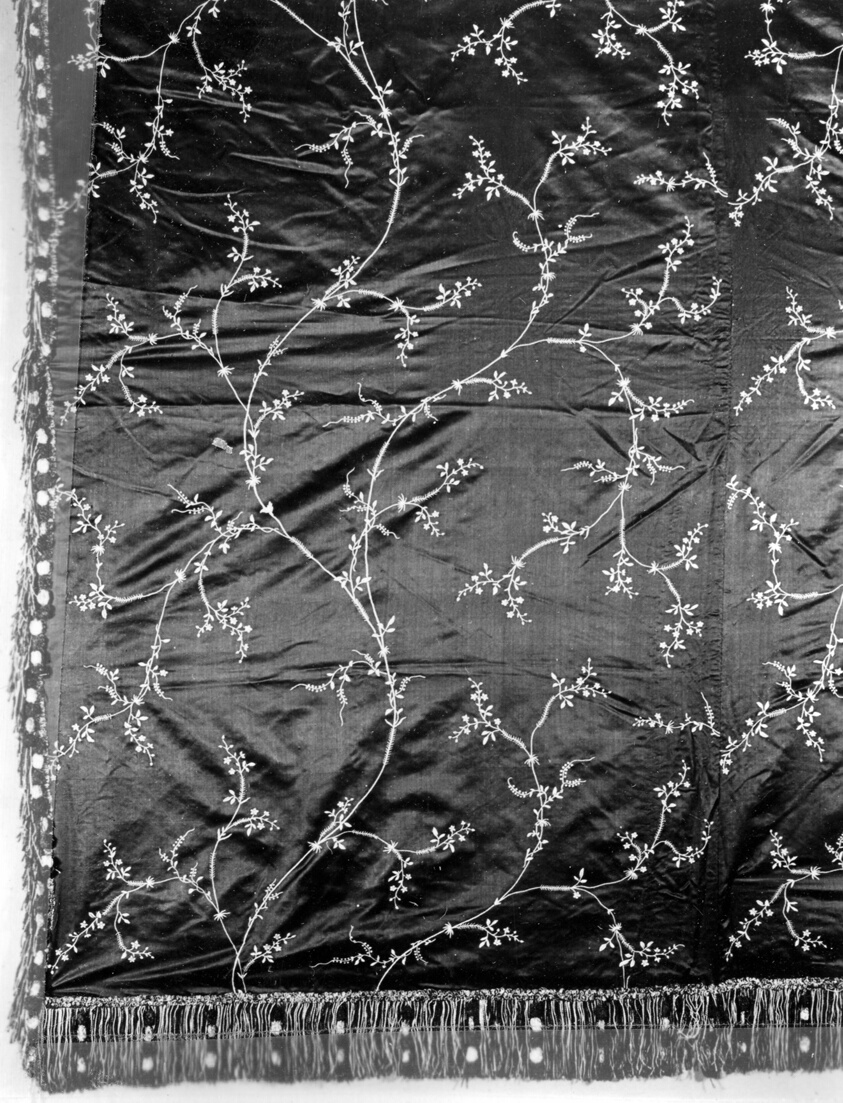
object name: Textile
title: Curtain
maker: France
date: 19th century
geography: France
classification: textile; needlework (visual works)